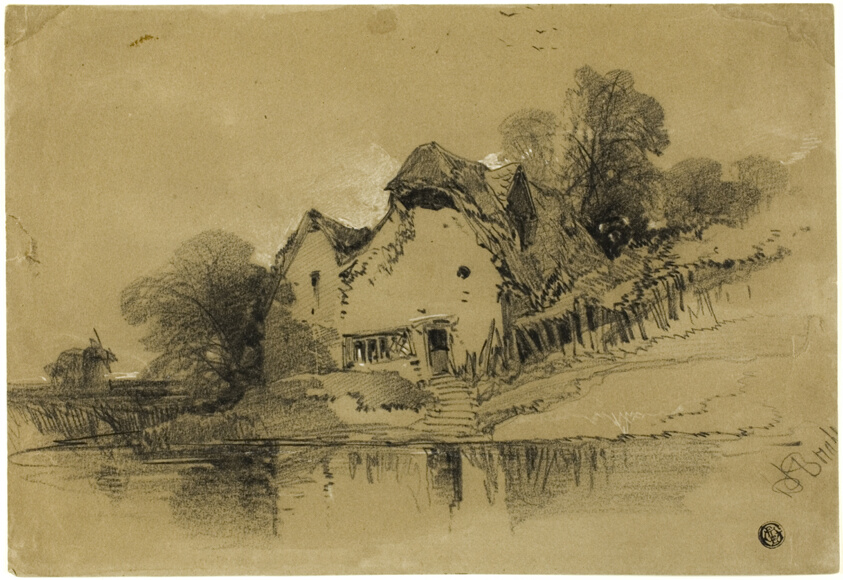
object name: Drawing and Watercolor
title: Cottage on Edge of Canal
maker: Henry Bright (English, 1814-1873)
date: c. 1840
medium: Black chalk heightened with white chalk, on brown wove paper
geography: England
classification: chalk; drawings (visual works); prints and drawing